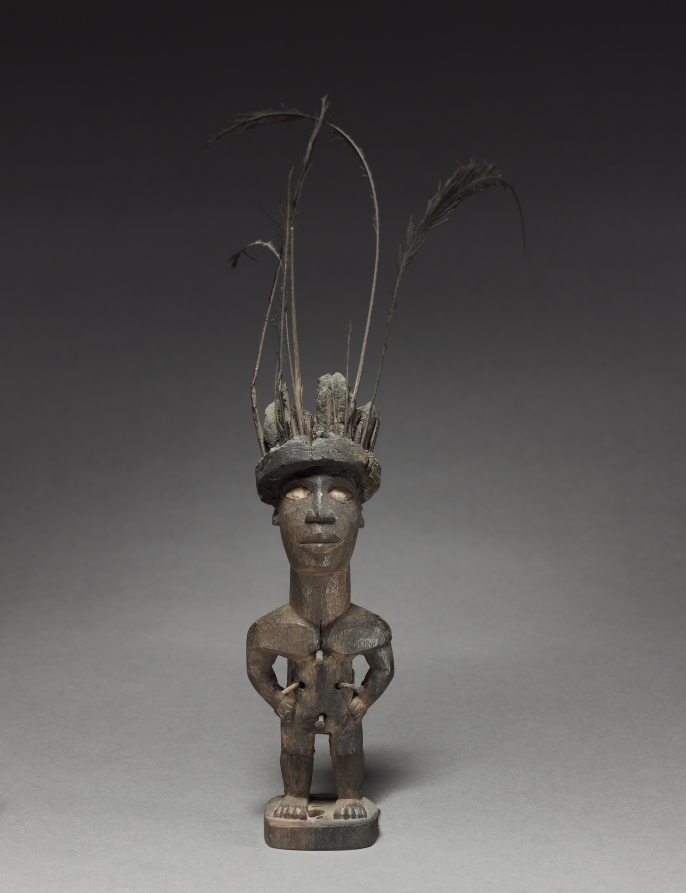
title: Power figure (nkisi)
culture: Africa, Central Africa, Republic of the Congo, Kongo-style maker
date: late 1800s–early 1900s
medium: Wood, feathers, organic material (including resin), iron, and possibly porcelain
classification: Sculpture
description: This figure had lost its nkisi load on the belly, but now shows how the mixture of earth, resin, leaves, glass, and other items was fixed onto the wooden figure, supported by four nails. It had been the property of “the sorcerer of Mboukou.”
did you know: This niksi figurine shows how the mixture of earth, resin, leaves, glass, and other items was fixed. It had been the property of “the sorcerer of Mboukou.”